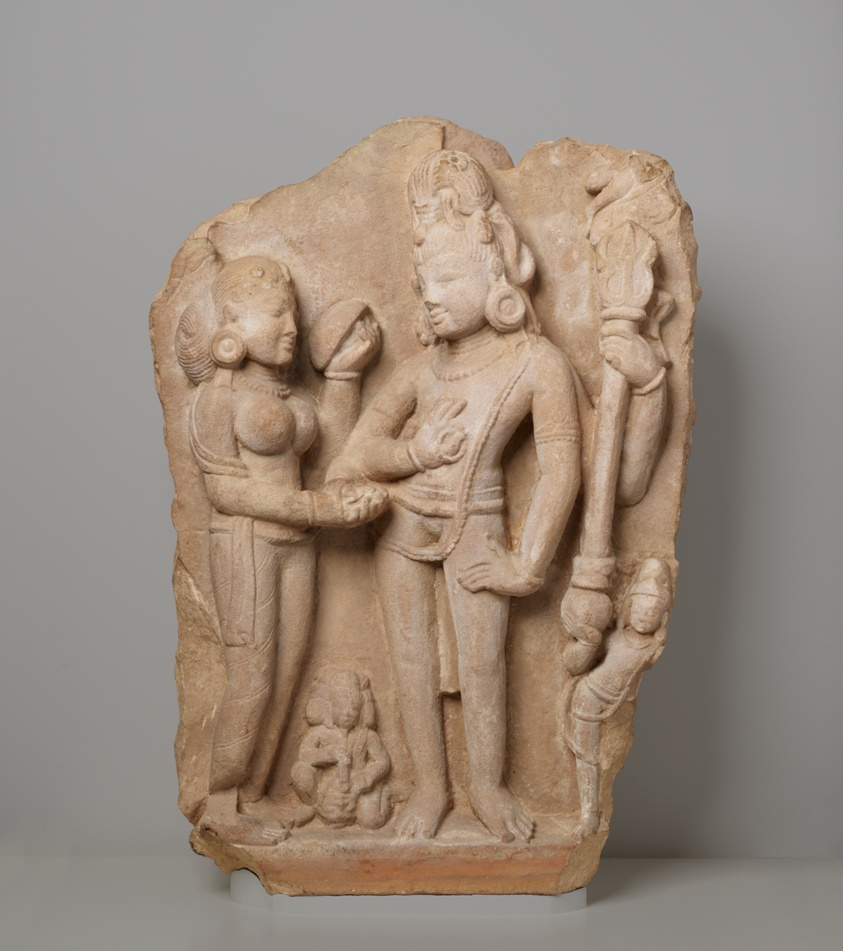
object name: Sculpture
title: Marriage of God Shiva with Goddess Parvati (Kalyanasundara)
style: South Asian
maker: India; Madhya Pradesh, Morena District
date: c. 11th century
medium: Sandstone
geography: Madhya Pradesh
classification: sandstone; stone; sculpture; asian art